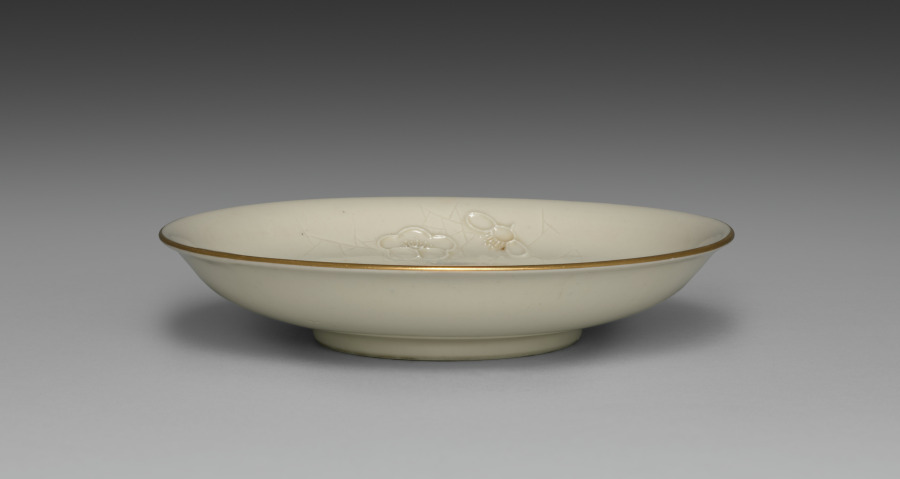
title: Medium-sized Dish from Dining Set with Plum Blossoms and Cracked-Ice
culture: Japan, Meiji period (1868–1912)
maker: Seifū Yohei II (Japanese, 1844–1878)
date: c. 1875–78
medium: Porcelain with molded designs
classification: Ceramic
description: Each item in this set has a delicate low-relief design of flowering plum branches over scattered, intersecting lines meant to resemble the cracked-ice surface of a frozen body of water and is signed on the base in gold pigment. While Yohei II produced many fine works in underglaze blue, like those produced by Kiyomizu Shichibei, he also made works in quite different styles later in his career, from the early 1870 s. In 1873, he was appointed purveyor to the Industrial Center of Kyoto Prefecture, a designation associated with Kyoto’s efforts to reach an international market through the port of Kobe; and from 1875 until his death, he was involved in national-level projects to present Japanese ceramics across the world. It was during this period that Yohei III was apprenticed to Yohei II, and it has been suggested that this set may in fact be an early example of Yohei III’s work, which he signed with his teacher’s name. Decorated with flowers resembling Japanese textile motifs, the set calls to mind the design of Yohei II’s pair of vases with plum blossoms in the Victoria and Albert Museum. Here, the elaborate trees created for a formal public exhibition setting have been translated into the approachable blossoms of the genteel domestic environment. While the designs are consistent across the pieces, each raised flower petal and pistil and each incised line in the ice was done by hand, so the cups, bowls, and dishes are similar yet unique. The bottoms of two boxes once identified the set’s owner, but the information has been deliberately obscured with black ink. However, inscriptions still visible appear to indicate two occasions, once at the end of July 1886 , and once again in June 1916 , when parts of the set were requested from Hokura in Niigata Prefecture. The location corresponds to a neighborhood in the present-day city of Jōetsu. The surname Tsuji 辻 also appears on a paper tag affixed to one of the box cloths. Future research may possibly reveal more about their provenance. A vase by Yohei III in a private collection combines the formal grandeur of the Yohei II vases in the Victoria and Albert Museum with the gentler design of this dining set, placing flowering plum trees against soft, scalloped-edge clouds resembling those in golden screens.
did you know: The dining wares have a creamy white coloration that the four boxes containing them identify as Korean in style.